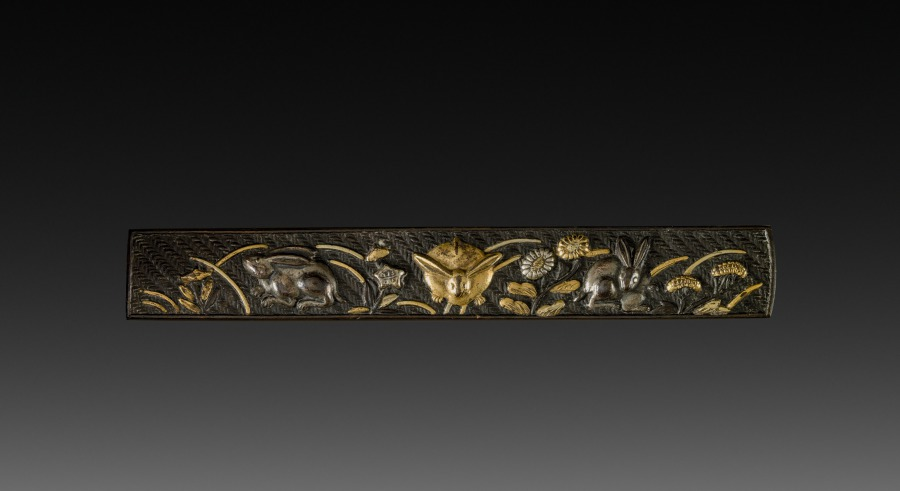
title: Knife Handle (Kozuka)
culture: Japan, Edo period (1615–1868)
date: early to mid-1800s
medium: inlaid bronze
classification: Metalwork